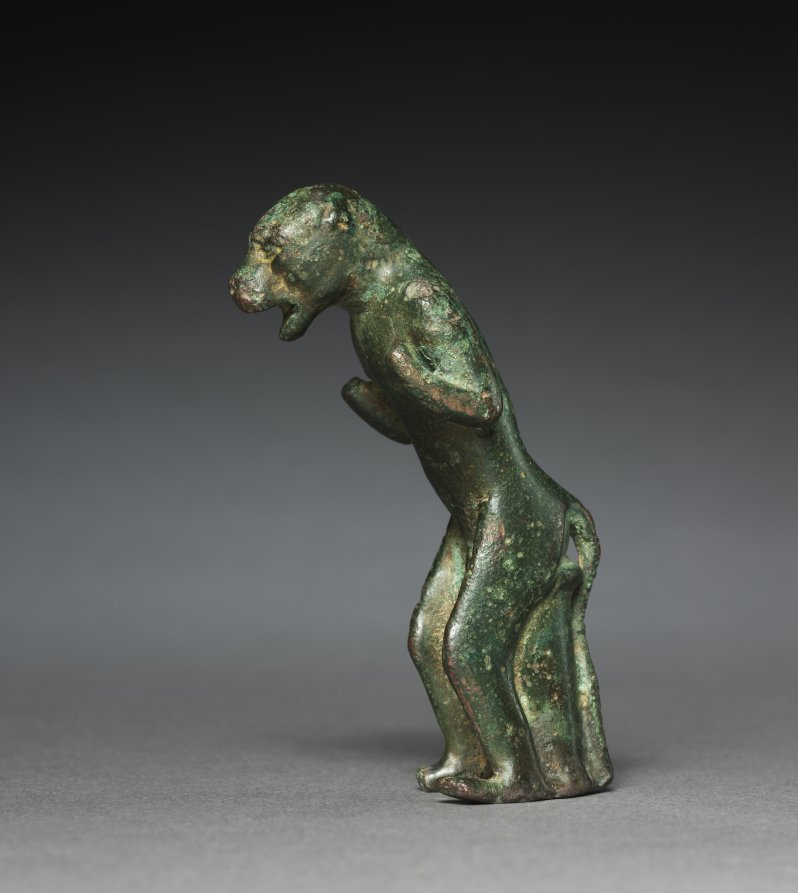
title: Baboon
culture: Egypt, Late period (715–332 BCE), Dynasty 26, Saite period (664–525 BCE)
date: 664–525 BCE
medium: bronze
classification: Sculpture